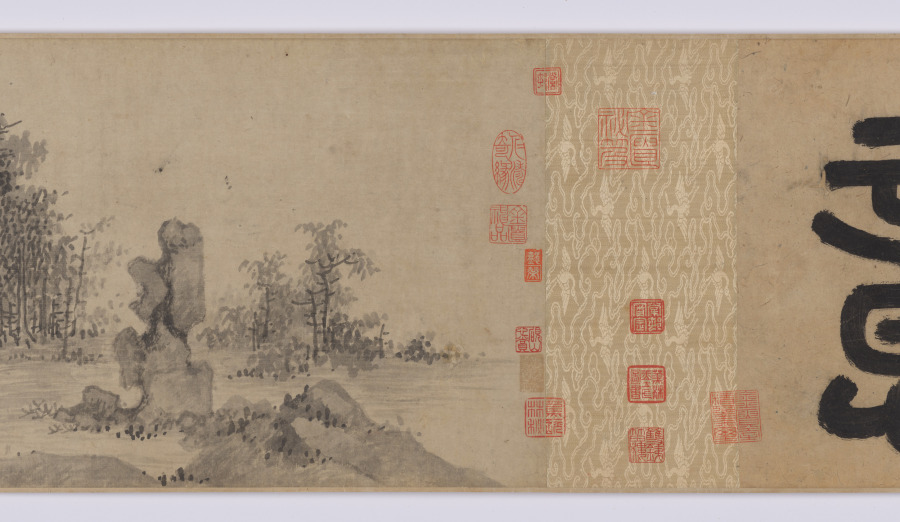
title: Poetic Feeling in a Thatched Pavilion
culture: China, Yuan dynasty (1271-1368)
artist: Wu Zhen (Chinese, 1280–1354)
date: 1347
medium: handscroll; ink on paper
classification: Painting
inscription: 依村構草亭，端方意匠宏。 林深禽鳥樂，塵遠竹松輕。 泉石俱延賞，琴書悅性情。 何當謝凡近，任適慰平生。 至正七年丁亥冬十月，為元澤戲作草亭詩意。梅沙彌書 [印]楳華盦; 嘉興吳鎮仲圭書畫記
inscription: 我愛梅花翁，巨老傳心印。 脩此水墨缘，種種得蒼潤。 樹石墮筆鋒，造化不能吝。 而今橡林下，我願執掃汛。 後學沈周 [印]启南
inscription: Colophon by Chen Rentao (1952): 予求梅道人畫二十年不可得。所見多膺鼎，即故宮所藏山水數軸都不可靠。傳世真迹，惟《漁父圖》、《嘉禾八景》與此《草亭詩意》而已。壬辰十月十四日余大病初愈，居家休養，研山師忽持此圖相贈。展卷披覽，頓覺精神沛振，如服僊藥。同日又得宋拓柳公權《神策軍紀聖德碑》，及群玉堂藏《真草書千(字)文》，皆海內孤本。一日得數寶，欣喜何如，書以志幸。 陳仁濤識 [印]陳氏仁濤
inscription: Colophon by Chen Rentao: 此圖作於至正七年丁亥，時年六十八，盖其晚年神品也。 濤又識 [印]陳仁濤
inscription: Title on frontispiece by Li Dongyang 李東陽 (1447-1516).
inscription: 33 additional seals: 1 seal of Li Chao-heng 李肇亨 (1592-1664)：檇李李肇亨書畫記; 9 seals of Liang Qingbiao 梁清標 (1620-1691): 蒼巖子、蕉林、蕉林梁氏書畫之印、蕉林秘玩、蕉林書屋、蕉林玉立氏圖書、棠邨 (appears twice)、棠邨審定; 1 seal of Wang Yirong (1845-1900): 懿榮; 3 seal of Li Yanshan (1898-1961): 雙銕笛樓 (appears twice)、硯山心賞; 12 seals of Chen Rentao 陳仁濤（1906-1968）：陳氏仁濤、陳仁濤珍藏印、金匱寶藏·陳氏仁濤 (appears three times)、金匱秘笈、金匱室、金匱室精鑒璽 (appears twice)、金匱室主、金匱神品、仁濤奇緣; 1 seal: 崐溟居士; 1 seal: 林止在㭯生圖書印; 3 seals unidentified.